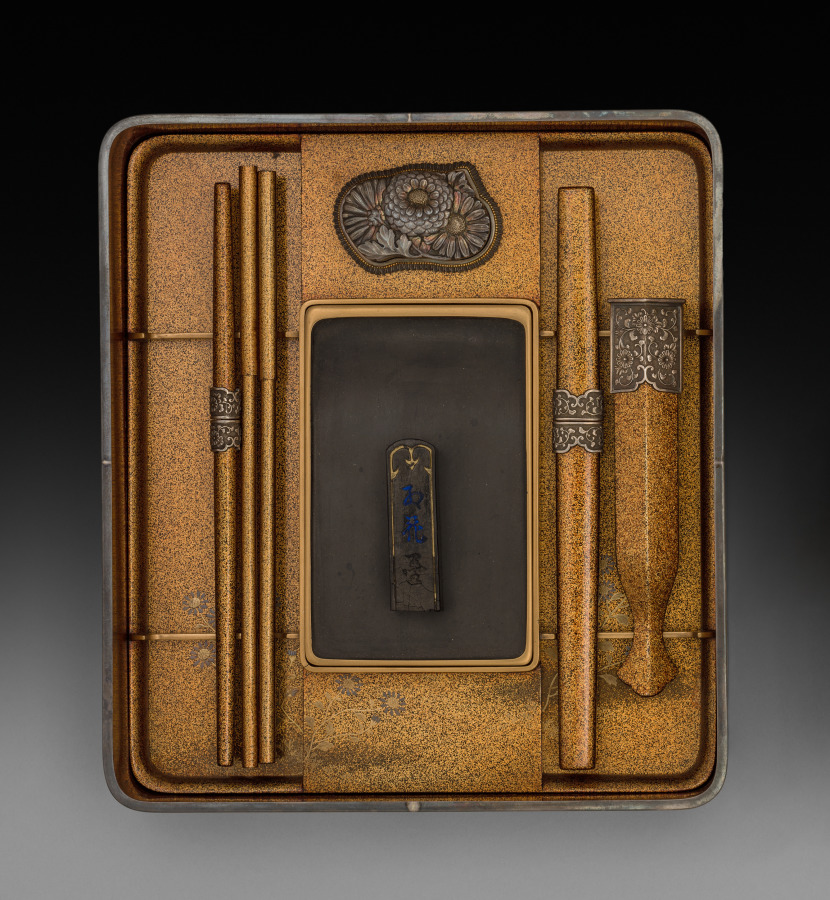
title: Base of Writing Box (Suzuribako) with Chrysanthemum and Plum Containing Inkstone, Water-dropper, Brushes, Ink-stick Holder, and Paper Knife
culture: Japan, Meiji period (1868–1912)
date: late 1800s-early 1900s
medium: Lacquer over wood with gold and silver sprinkled powder (maki-e)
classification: Lacquer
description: Both functional and elegant, this is a container for an ink stone, brushes, and ink from a set of writing tools that included a larger box for paper. Against a sleek gold lacquered ground, its artist has used restraint in sprinkled powder decoration (maki-e) to produce the design of cockscomb and harvested rice on the interior of the lid.